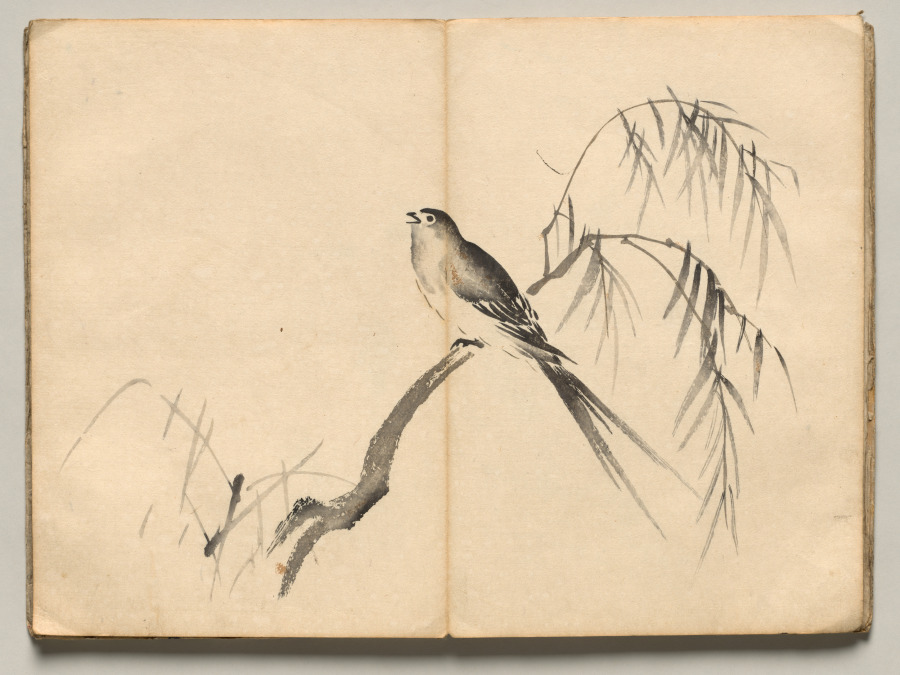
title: Warbler from Ōkyo Picture Book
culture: Japan, Edo period (1615–1868)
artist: after Maruyama Ōkyo (Japanese, 1733–1795)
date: 1850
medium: accordion-style woodblock printed folding-book; ink and color on paper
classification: Bound Volume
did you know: This impression of a book of woodblock-printed designs is missing a spread that depicts a crane.